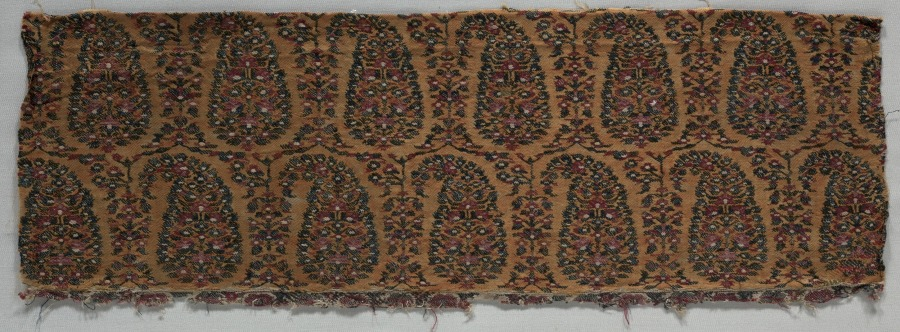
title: Fragment of a Shawl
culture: India, Kashmir, 19th century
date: 1800s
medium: tapestry weave: wool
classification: Textile